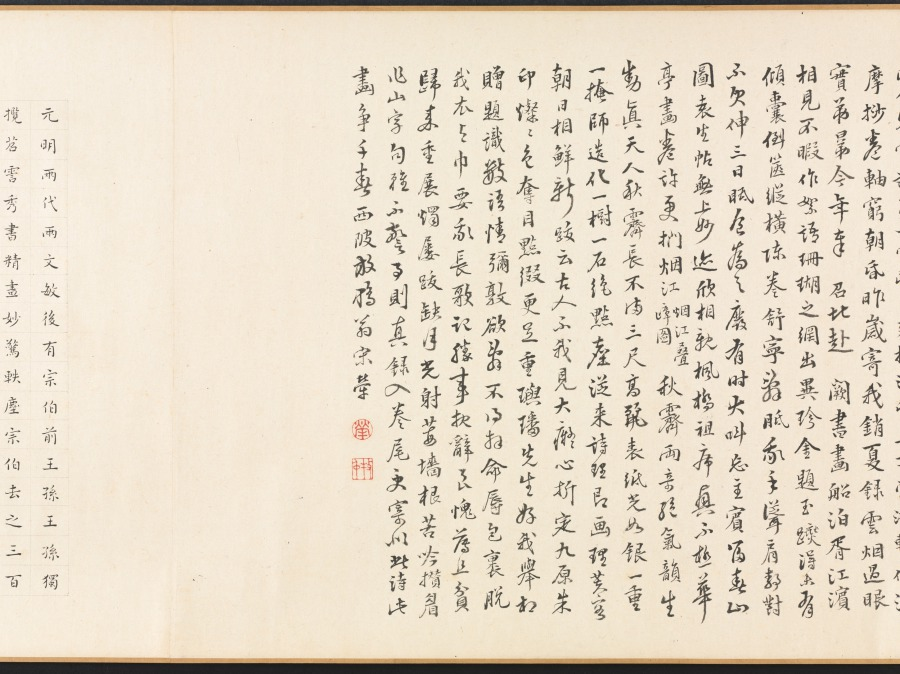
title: River and Mountains on a Clear Autumn Day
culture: China, Ming dynasty (1368–1644)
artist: Dong Qichang (Chinese, 1555–1636)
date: c. 1624–27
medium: Handscroll; ink on Korean paper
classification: Painting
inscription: 黃子久江山秋霽似此，當恨古人不見我也。思翁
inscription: 董文敏每遇高麗鏡面箋，書畫尤為入神。此卷改表紙用之，字跡隱然，兼有朝鮮之印。至於筆法圓秀，真接倪黃。豈文沈所可同日而語也。 康熙庚午中秋後一日，天氣澄爽，重裝初畢，跋於瓶廬。抱瓮翁高士奇。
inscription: Second inscription by Gao Shiqi 高士奇 (1645–1704): On the twenty-third day of the ninth month, the jiaxu year of the Kangxi era [1694], I packed my bags to head north. When my boat passed Wuchang [Suzhou], Mr. Mantang [Song Luo] brought wine to bid me farewell so that we could share our thoughts on our separation in the last few years. I showed him the paintings and calligraphy which I collected and asked his opinions. Since Mr. Mantang does not own any handscrolls by Wenmin [Dong Qichang], I leave this one for him in commemoration of our parting; thus the painting will have a worthy owner and our meeting will become a beautiful story in the future. It is the fourth day after the beginning of winter, with the sky clear and sober. Trees under frost have turned red and yellow, seemingly echoing the brush and ink in the painting. I also ask Mr. Mantang to inscribe a poem to commemorate our meeting so that it will survive forever.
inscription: 1 colophon and 4 seals of Song Luo 宋犖 (1634–1713): Who is the foremost art connoisseur of our dynasty?/ Tangcun [Liang Qingbiao, 1620–1691] is dead, so the title passes to Jiangcun [Gao Shiqi]./ Leaving office, you retired for five years in the Lake region./ Fondling handscrolls and hanging scrolls from morning to evening./ You sent me your collection catalogue Xiao Xia Lu last year;/ It is indeed the true equal of [Zhou Mi's] Yun Yan Guo Yan./ This year you returned to the capital by imperial order;/ Your boat with calligraphy and paintings anchored at the river bank in Suzhou./ When we met each other you did not waste any time for conversation by poured out immediately/ From your "coral net" extraordinary treasures./ You produced incomparable scrolls, with gold-inscribed labels and jade rollers,/ Pouring out from bags and trunks, they were spread in disarray./ Without a word, I rolled and unrolled until my fingers were numbed,/ We sat straight, facing each other quietly, and never felt tired./ For three days we forgot about sleeping and food./ And at times we shouted our joy out loud, forgetting who is host or guest./ Your Dwelling in the Fuchun Mountains and the Yuansheng manuscript/ These peerless works I myself examined with delight./ As an added pleasure to the farewell dinner under the Maple Bridge,/ You allowed me to hold again this handscroll by Dong Qichang--/ The Misty River and Piled Peaks [by Zhao Mengfu] and this Clear Autumn Day are two extraordinary masterpieces./ In showing such life and spirit with "qi yun." the artists were truly "men of heaven."/ The Clear Autumn Day is not even three feet long,/ Painted on tributary Korean paper, it shines like silver./ Every building up and every turn of the mountains imitates nature,/ Every tree and every rock is removed from the commonplace./ From the beginning, the theory of poetry is the theory of painting,/ Like the lotus and the morning sunshine, they complement and refresh each other./ The artist's inscription regrets that "the Old Masters cannot see my scroll."/ Huang Gongwang would have agreed in his grave./ The vermilion of the seals glitter and dazzles the eyes,/ These added accessories are as valuable as jade./ You are very kind to give it to me,/ The feelings expressed in your inscription are so sincere./ Wanting to refuse, but unable, I accept it to respect your wish,/ And taking off my gown and cap I wrapped it with care./ You asked me to write a long poem in commemoration of this beautiful occasion,/ I am too ashamed that my effort in response is so poor and inadequate./ Returning home, I unrolled it under candlelight, trying to write the colophon,/ The light of the waning moon shines at the foot of the mossy wall./ Earnestly humming and brows knit in deep thought, I try to compose;/ The verses are not outstanding, but the facts are real./ With this poem recorded at the end of the scroll, I mail it to you for approval,/ This poem and this painting shall outlast a thousand springs. (Translation by LYSL/HK/WKH)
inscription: 1 colophon and 2 seals of Shao Changheng 邵長蘅 (1637–1704); 2 inscriptions and 14 seals of the Qianlong 乾隆 emperor (r. 1736–95); 1 seal of the Jiaqing 嘉慶 emperor (r. 1796–1820); 3 seals of the Xuantong 宣統 emperor (r. 1908–11); 1 seal unidentified.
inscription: [印] 朝鮮國王之印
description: Dong Qichang had a tremendous impact on the artistic practices and historiography of later generations; his works and writings shaped literati aesthetics. Here, Dong places an abstract landscape composition diagonally across the picture plane, configured to recall earlier masters and simultaneously express his own personal style. Dong’s inscription claims, Huang Gongwang’s Autumn Day, looks like this. I truly regret the master has not seen my work. In fact, Dong Qichang may have had Dong Yuan’s Xiao and Xiang Rivers in mind, a work he owned and considered a key work in Chinese art history.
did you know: The painting has an imprint of a Korean seal that reads "Seal of the king of Joseon."